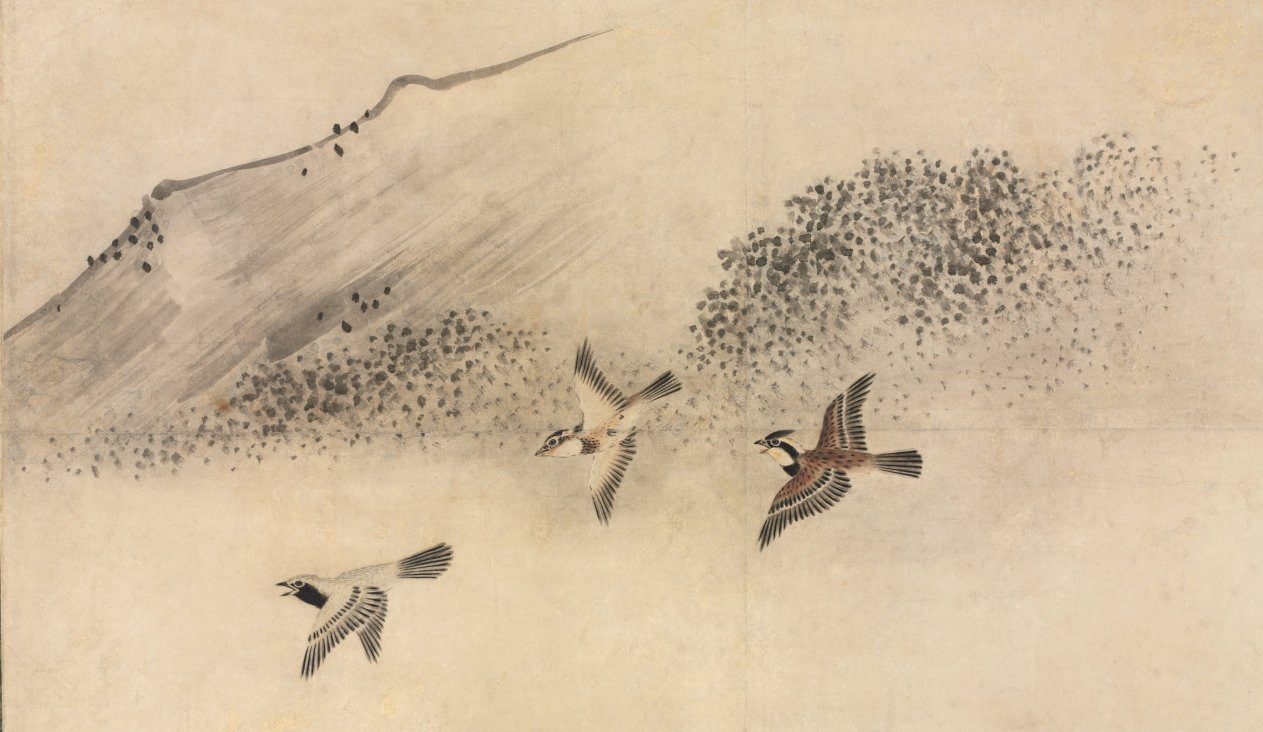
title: Flowers and Birds in a Spring Landscape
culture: Japan, Muromachi period (1392–1573)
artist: attributed to Kano Motonobu (Japanese, c. 1476–1559)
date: 1500s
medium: One of a set of sliding door panels mounted as hanging scrolls; ink and color on paper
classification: Painting